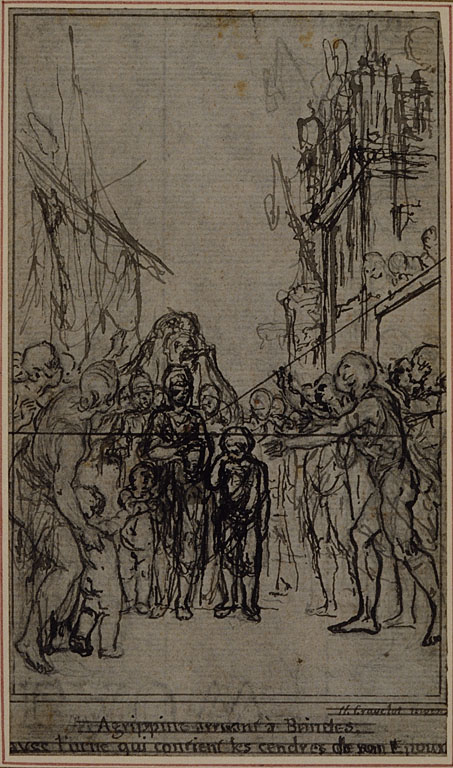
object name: Drawing and Watercolor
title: Study for an illustration in Tacitus "Tibère, ou Les Six Premiers Livres des Annales", Book III, Vol. 2, 1st Study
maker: Hubert François Gravelot (French, 1699-1773)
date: c. 1768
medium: Pen and black ink, with graphite and traces of red chalk, on gray laid paper, incised for transfer and perimeter mounted on ivory laid paper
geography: France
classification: pen and ink drawings; drawings (visual works); prints and drawing